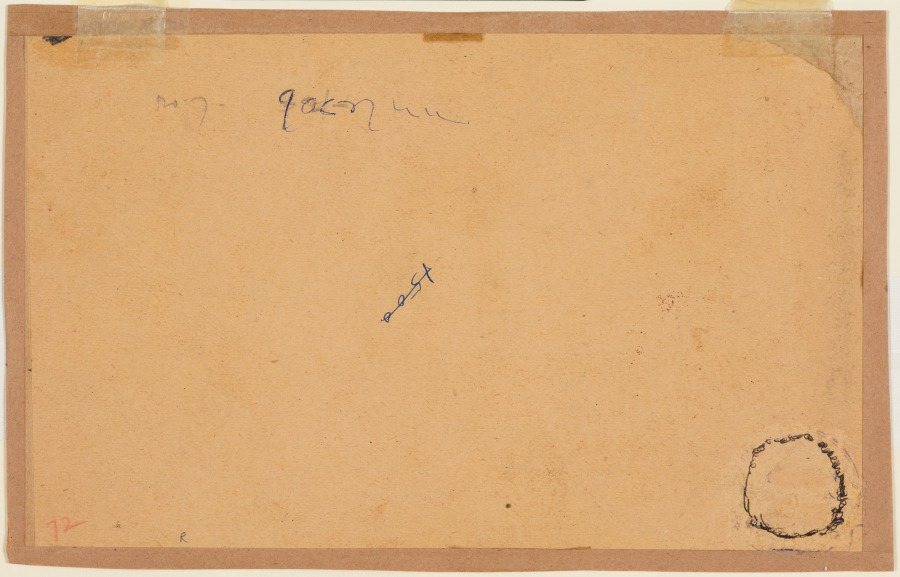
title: The Goddess Annihilates the Demon Raktabija, from a Devi-Mahatmya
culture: Central India, Madhya Pradesh, Malwa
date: c. 1640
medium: gum tempera, ink, and gold on paper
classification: Painting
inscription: raktapīju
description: The demon Raktabija had received a boon that from each drop of his blood that falls on the ground, a new demon would arise. When the Goddess wounded Raktabija in combat, and drops of his blood fell on the ground and generated new Raktabijas, she extended her tongue to catch every drop before it hit the ground. Here she is shown lapping up Raktabija himself.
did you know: The painting also depicts Hanuman, the monkey god, fighting for the Goddess.